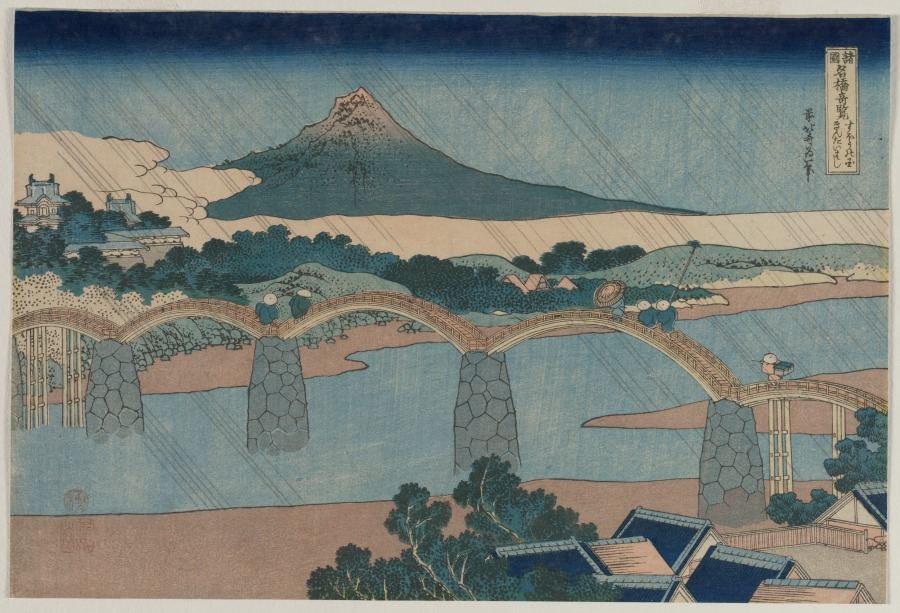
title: The Brocade Bridge in Suo Province (from the series Curious Views of Famous Bridges in the Provinces)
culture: Japan, Edo period (1615–1868)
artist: Katsushika Hokusai (Japanese, 1760–1849)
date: early 1830s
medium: color woodblock print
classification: Print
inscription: Signature: Zen Hokusai Iitsu hitsu Publisher: Nishimuraya Yohachi (Eijudo)